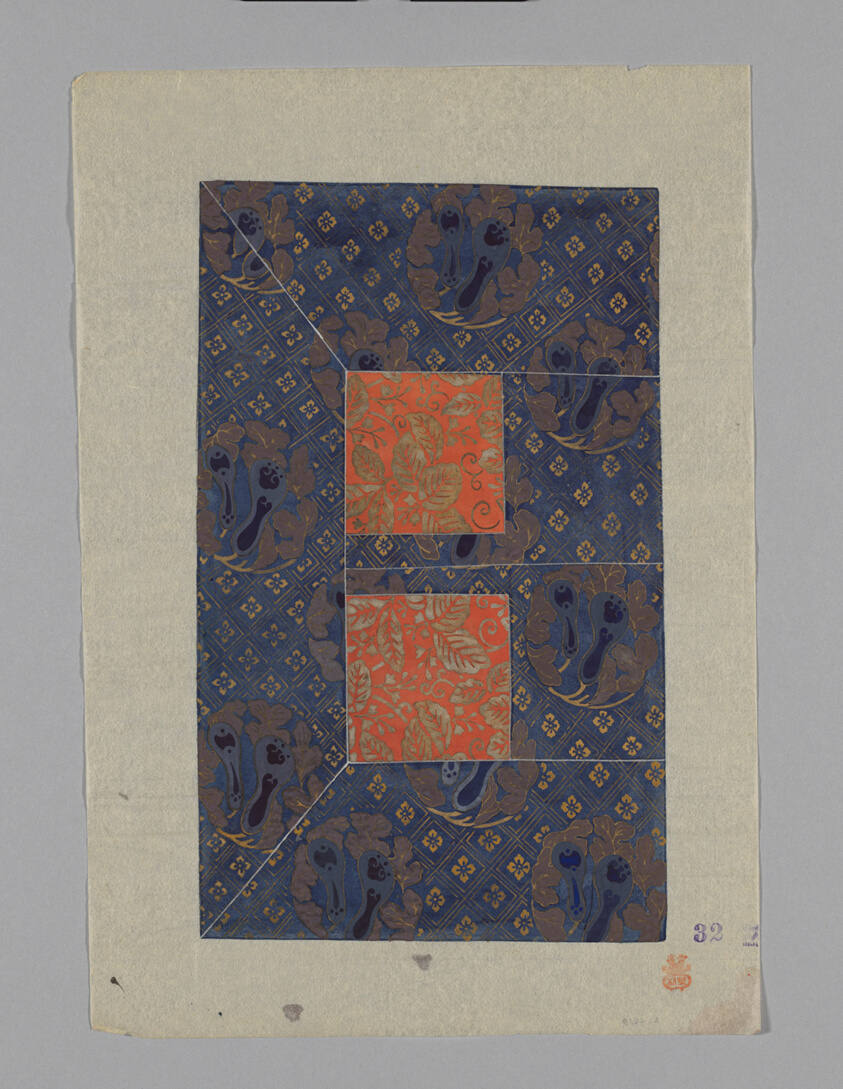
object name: Drawing and Watercolor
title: Design on Paper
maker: Japan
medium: Paper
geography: Japan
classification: textile; accessory - paper design; watercolor; paper